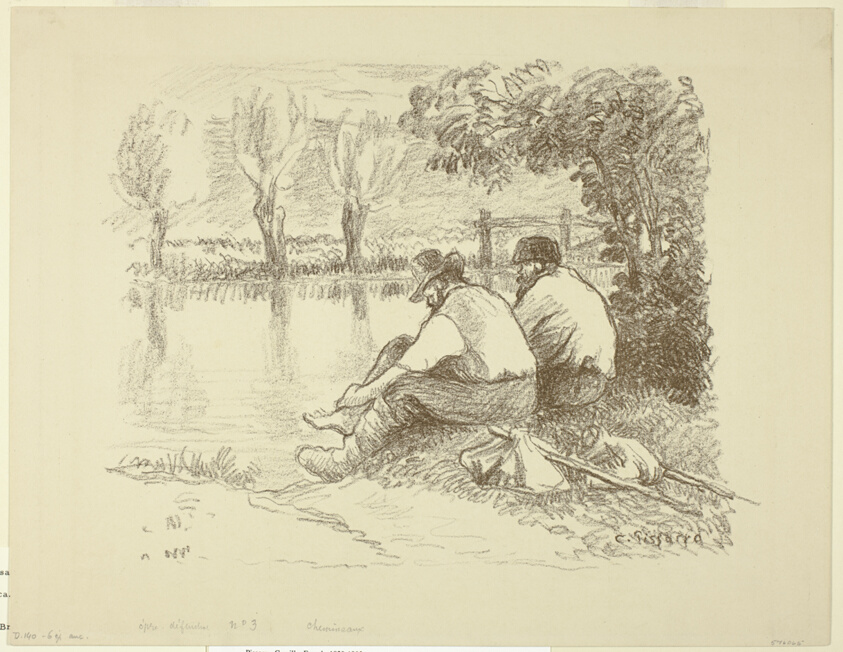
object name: Print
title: Tramps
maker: Camille Pissarro (French, 1830-1903)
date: c. 1894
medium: Lithograph in gray-brown on cream wove paper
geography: France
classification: lithograph; print; prints and drawing